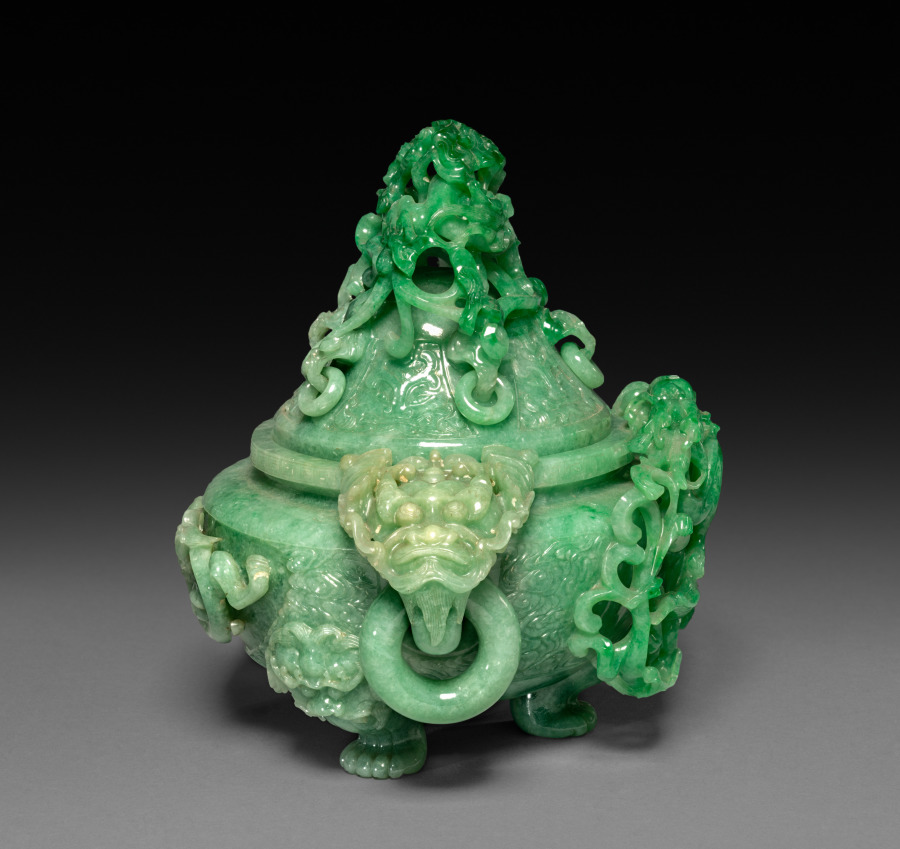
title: Three-Sectional Altar Group: Koro with Lid and Base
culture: China, Qing dynasty (1644-1911)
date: 1644–1911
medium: jade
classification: Jade